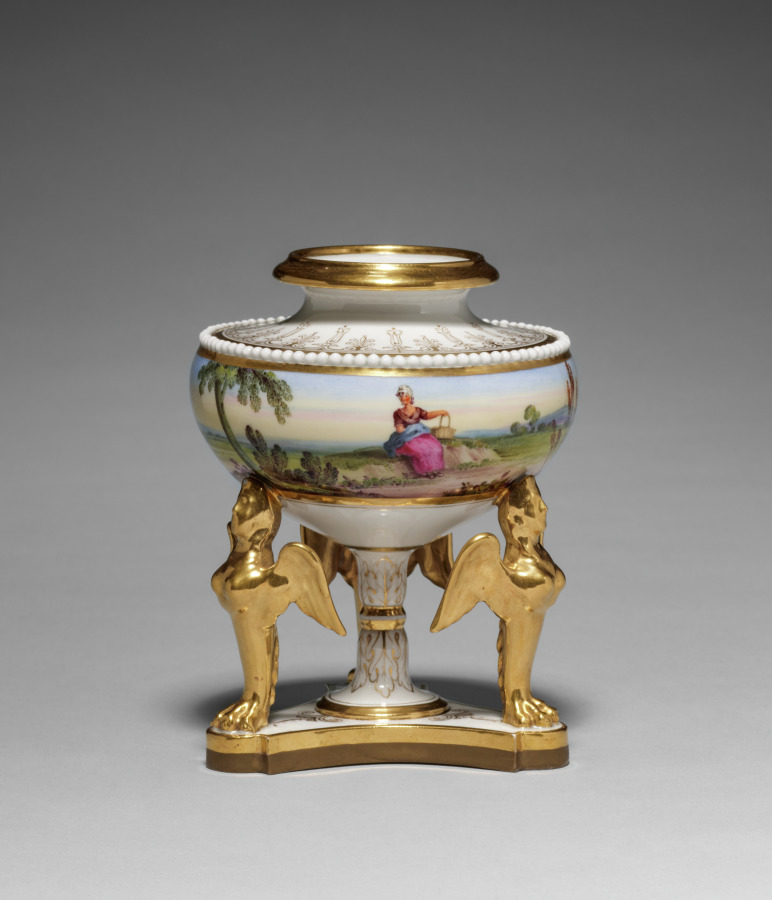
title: Urn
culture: England, Worcester, 19th century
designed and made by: Flight, Barr and Barr (British)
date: c. 1815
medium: artificial porcelain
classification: Ceramic